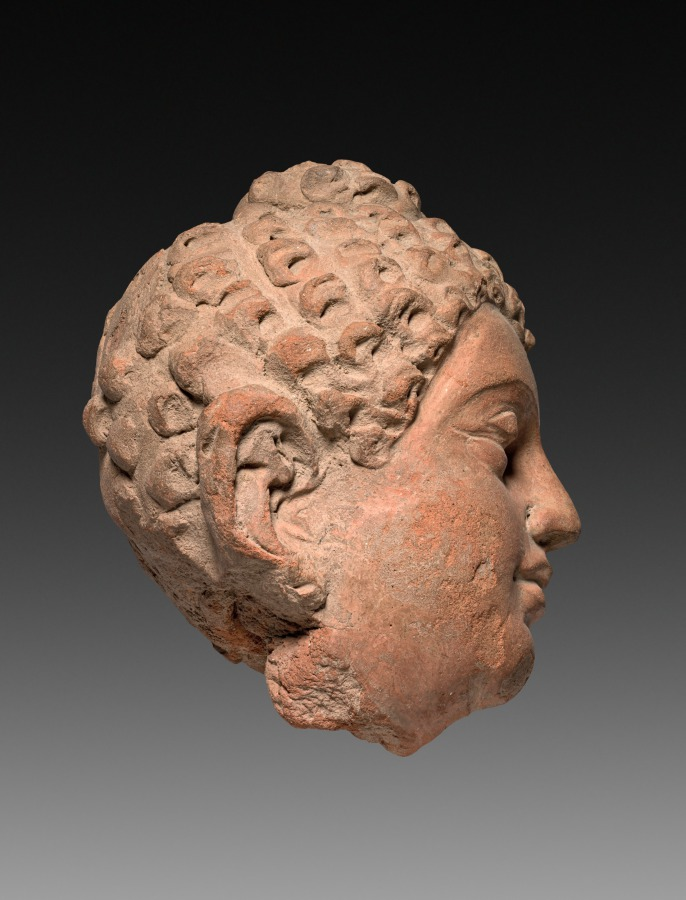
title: Head of Buddha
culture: India, Kashmir, Akhnur school, 8th century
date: 700s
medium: Clay, accidentally burned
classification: Sculpture